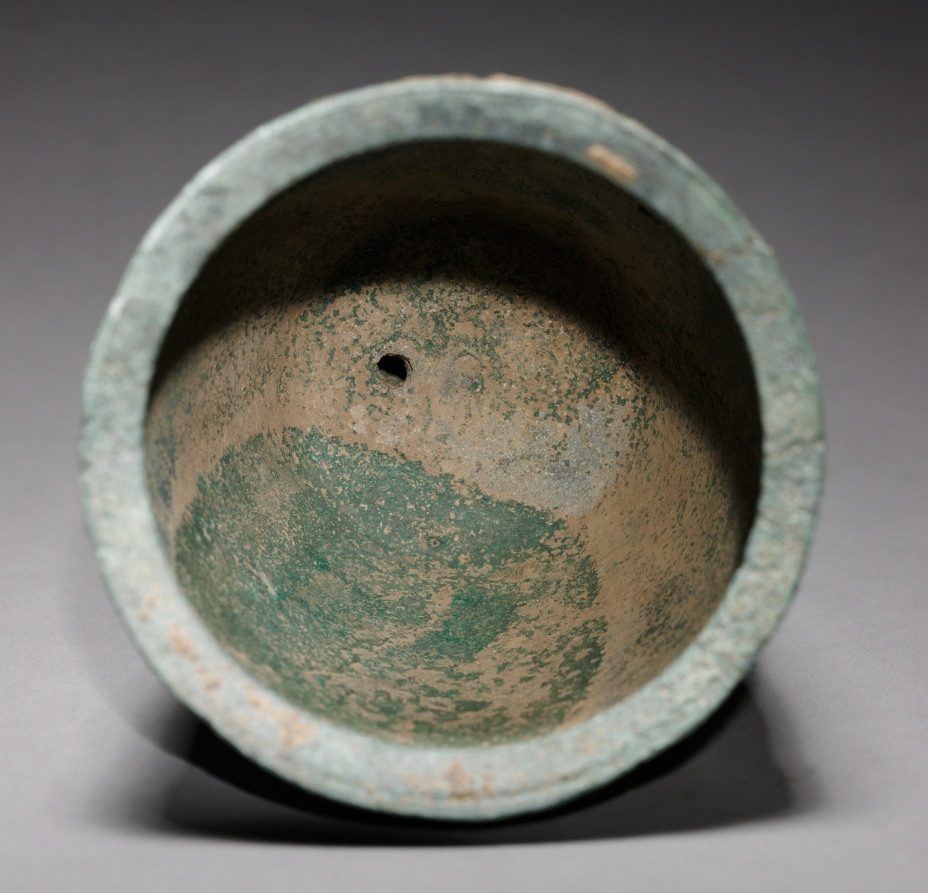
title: Bronze Ritual Bell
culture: Korea, Goryeo dynasty (918–1392)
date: 1226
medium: cast bronze with incised inscription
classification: Metalwork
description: This miniature bell was once used as part of Buddhist indoor rituals. Likely suspended in a Buddhist temple, it features a cast dragon and a vertical tube to amplify the sound on top, and is decorated with Buddhist figures seated on lotuses. The echoing sound of the bell was thought to help Buddhist believers understand the significance of transience and impermanence; the sound instantly fades away as soon as one hears it. This sensory experience creates a striking conceptual parallel with Buddhist teachings, including the idea that all things and beings exist merely in our perception or imagination. An inscription indicates it was cast in the year of the dragon and took three years to make.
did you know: The inscription informs us that this miniature indoor bell was produced in 1226.